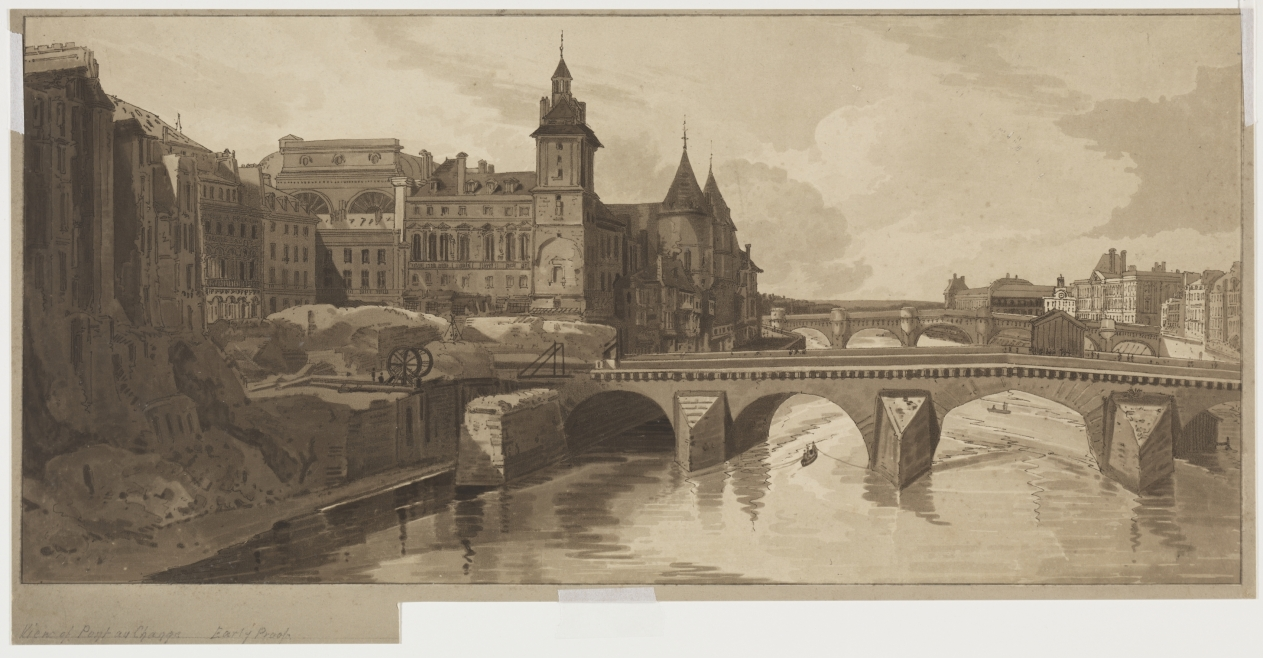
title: Selection of Twenty of the Most Picturesque Views in Paris:View of Pont au Change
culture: England, 19th century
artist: Thomas Girtin (British, 1775–1802)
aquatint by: Frederick Christian Lewis (British, 1779–1856)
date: 1802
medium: softground etching and aquatint printed in brown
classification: Print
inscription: Lower left, in graphite: View of Pont au Change Early Proof